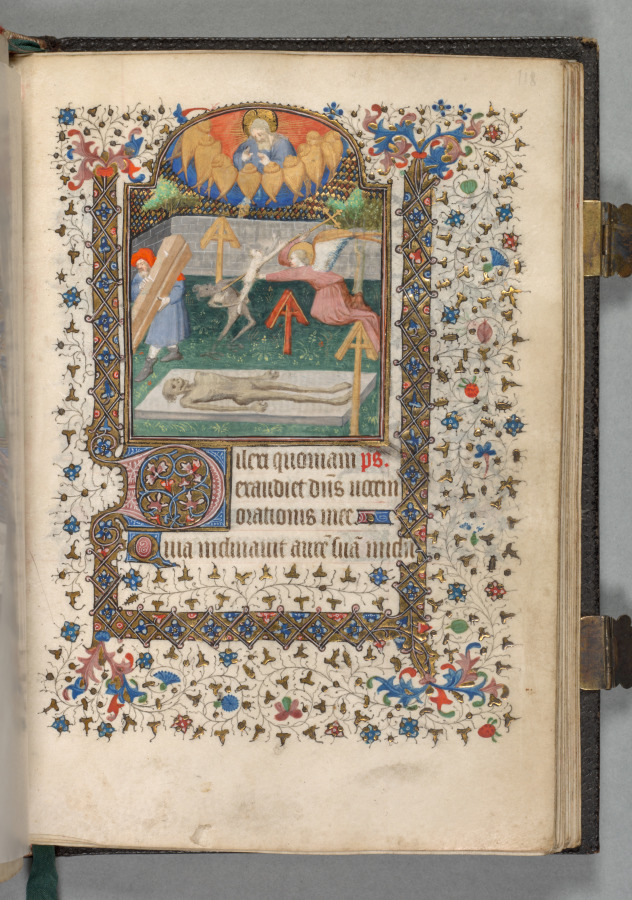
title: Book of Hours (Use of Paris): Fol. 118r, Angel and Devil Fighting over a Soul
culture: France, Paris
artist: possibly studio or workshop of The Bedford Master (French, Paris, active c. 1405–30)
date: c. 1420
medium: ink, tempera, and gold on vellum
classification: Bound Volume